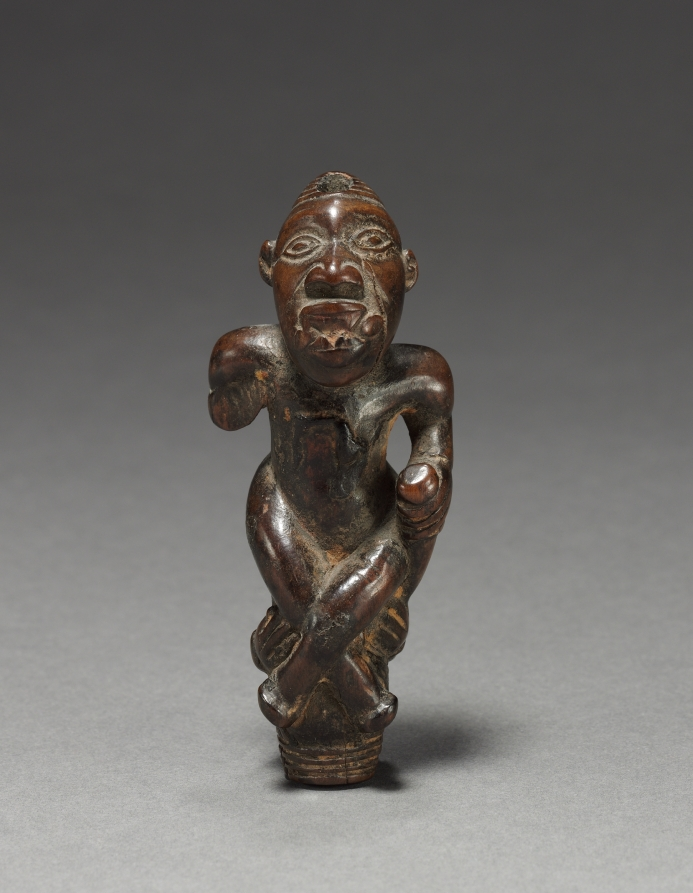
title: Male Figurine or Finial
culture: Central Africa, Democratic Republic of the Congo (most likely), Cabinda, or Republic of the Congo, probably Yombe people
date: early 1800s-early 1900s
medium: Wood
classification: Sculpture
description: This figurine or finial may have contained a medicine-filled package on its abdomen. The man seated with his legs crossed and wearing a coiffure of Portuguese inspiration may represent a chief, which was once attached to a scepter or perhaps a flywhisk. Beneath the chief, a child holds onto his back; though such imagery is more typically seen with female sculptures.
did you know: The stomach cavity was once filled with medicinal substances; once removed, the nkisi figure is considered “decommissioned.”